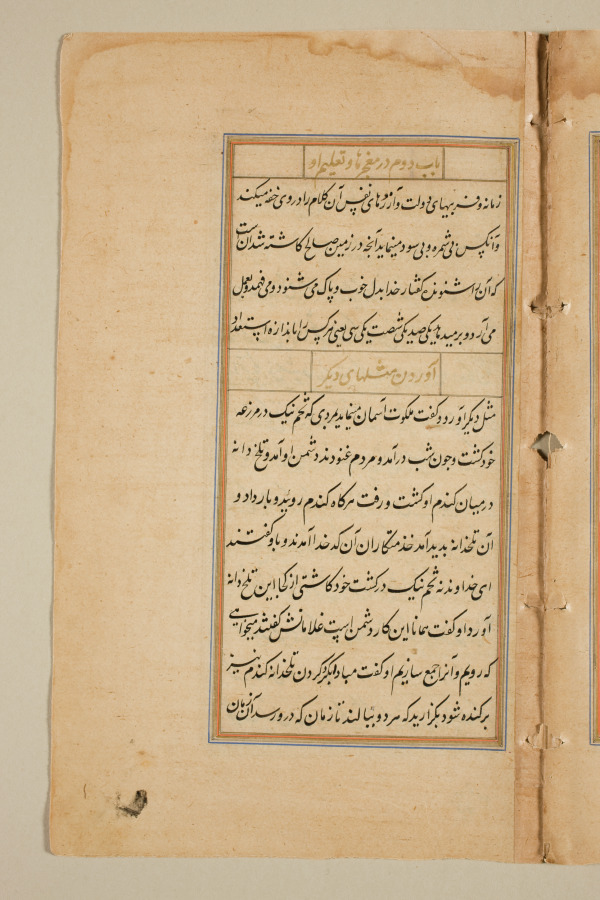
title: Text page from a Mirror of Holiness (Mir’at al-quds) of Father Jerome Xavier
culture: Mughal India, Allahabad, made for Prince Salim (1569–1627)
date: 1602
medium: Ink and gold on paper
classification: Manuscript